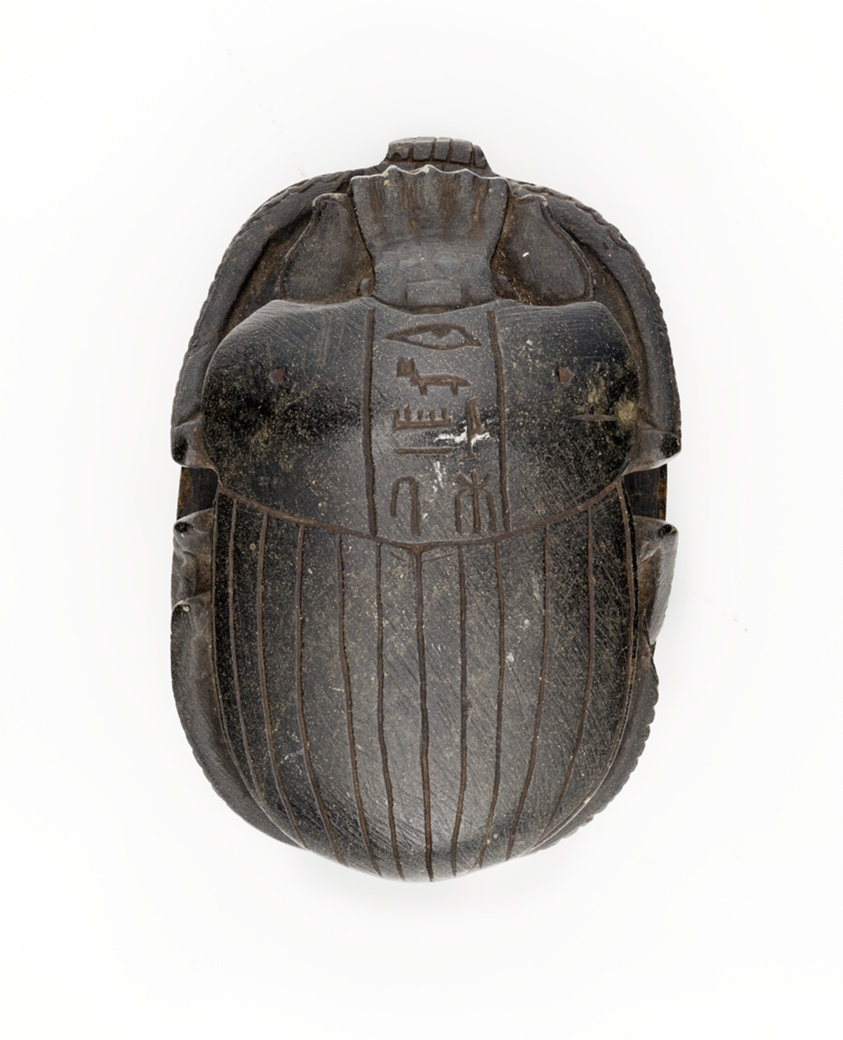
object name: Costume and Accessories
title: Heart Scarab of the Worker Amun-mes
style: new kingdom, egyptian, ancient, nineteenth dynasty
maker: Egyptian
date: New Kingdom, Dynasty 19, reign of Ramesses II (about 1279-1213 BCE)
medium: Steatite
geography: Egypt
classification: scarab; stone; ancient art; costume; amulet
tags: scarab beetle, insects, Hieroglyphs